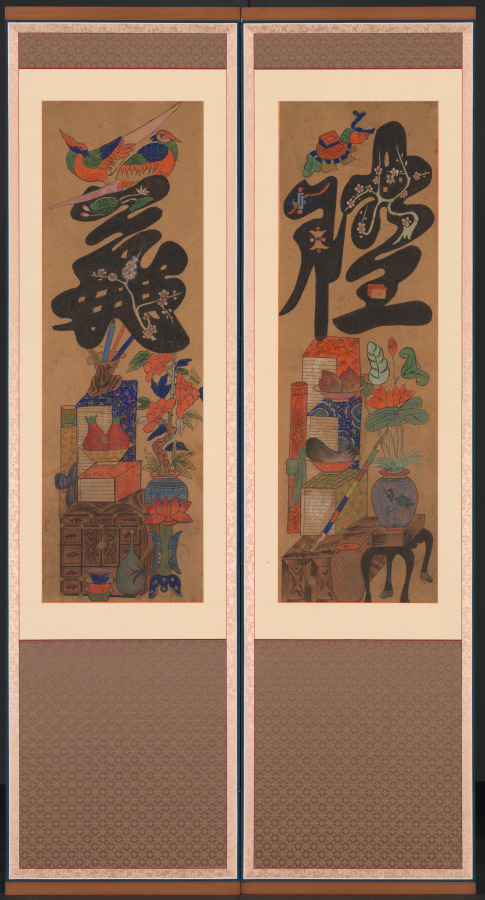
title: Munja-Chaekgeori Screen (Character-Books Screen)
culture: Korea, Joseon dynasty (1392–1910)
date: early 1900s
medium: Eight-panel folding screen, ink on paper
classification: Painting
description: This folding screen is a whimsical harmony of two different subjects: chaekgeori, or books and things; and munja, or characters. The lower section of each panel depicts the imagery of things, including books, decorative arts, and utilitarian objects. The upper portion of each panel bears a classical Chinese character. Read from far right to left, the eight characters refer to the values of Confucian teachings of the Joseon dynasty: filial piety, brotherly love, loyalty, trust, propriety, righteousness, modesty, and humility. While these two pictorial genres are harmoniously conjoined on the same picture plane, two sharply contrasting world views—urban consumerism and traditional Confucian ethics that despise materialism—compete with one another.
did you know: The eight Korean characters each mean filial piety, brotherly love, loyalty, trust, propriety, righteousness or justice, modesty or integrity, and humility or the feeling of shame.